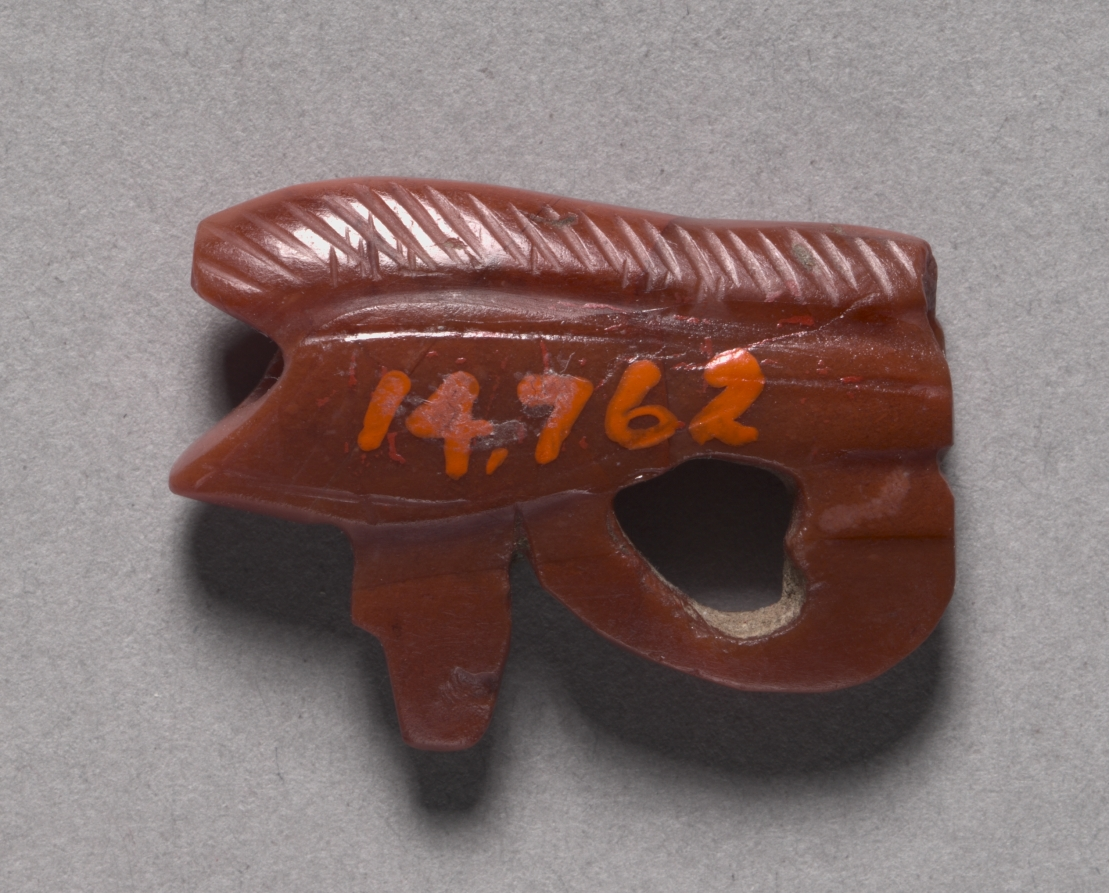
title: Eye of Horus Amulet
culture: Egypt, New Kingdom (1540–1069 BCE), Dynasty 18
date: 1540–1296 BCE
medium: carnelian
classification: Amulets